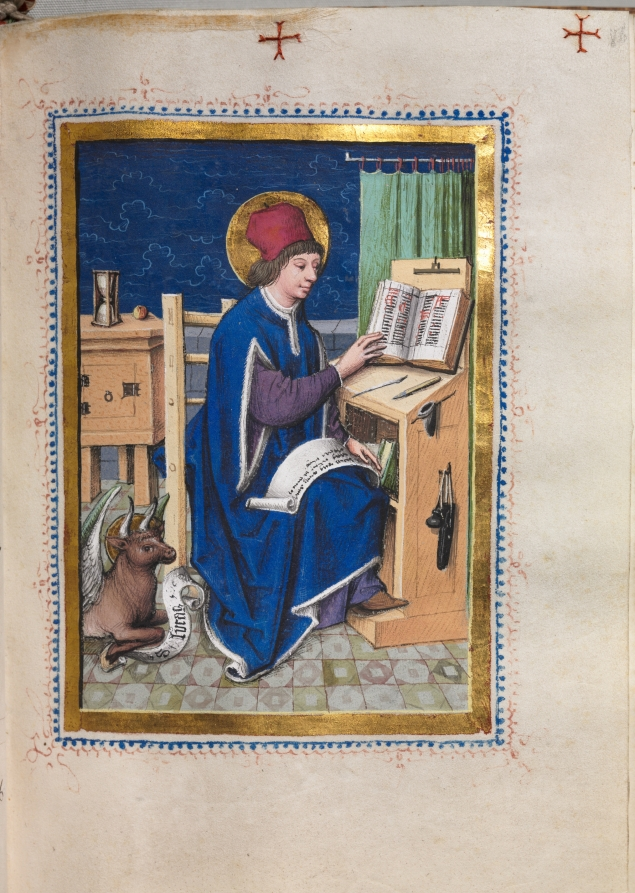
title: Gospel Book with Evangelist Portraits: Saint Luke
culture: Germany, Middle Rhine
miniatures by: Master of the House-Book (German, c. 1470–1500)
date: 1480–1500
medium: ink, tempera, and gold on vellum; original blind stamped leather binding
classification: Bound Volume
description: The four gospels are preceded by a full-page portrait miniature of the appropriate evangelist. Per tradition, they are represented as contemporary scribes surrounded by all the tools of their trade— ink pots, quill pens, and penknives. The anonymous illuminator of these miniatures, called the Hausbuch Master, is known primarily for an album of lively drawings as well as some 90 copper engravings now in Amsterdam. He was also apparently a panel painter of some distinction. The skillful pen work, tracery, and vine scrolls, as well as the large initials, are the work of other artists.The binding is original.